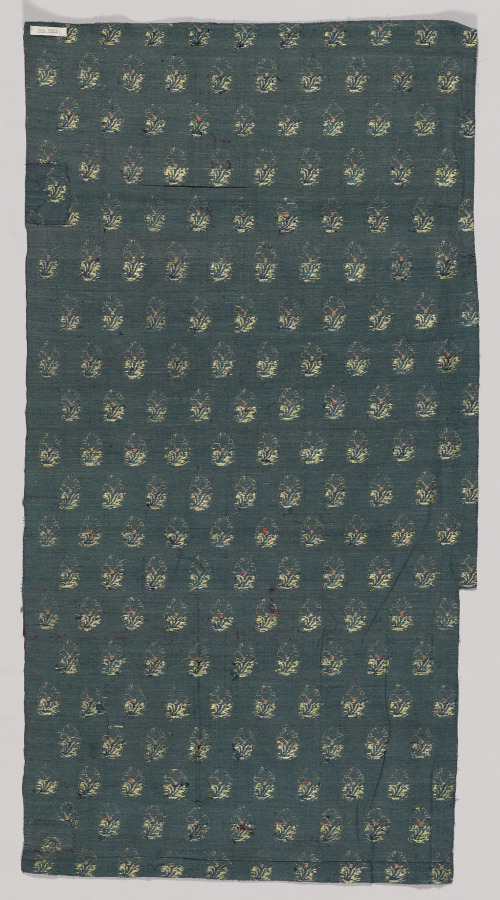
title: Fragment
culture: India, Warangal, 18th or 19th century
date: 1700s or 1800s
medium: brocade, "himru"; cotton, silk and gold thread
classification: Textile